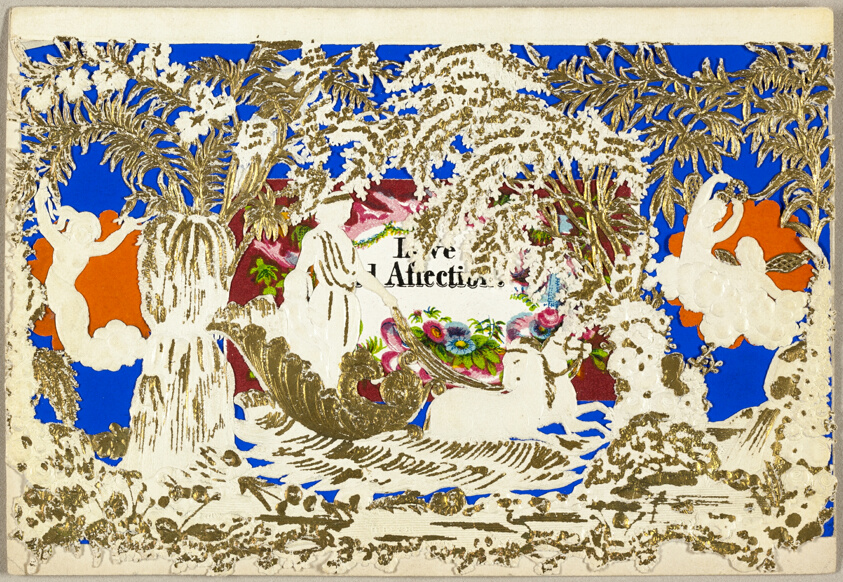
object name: Drawing and Watercolor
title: Untitled Valentine (Couple in Chariot)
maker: John Windsor (English, 19th century)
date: 1860/69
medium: Gold paint with collaged elements on cut and embossed (designed) ivory wove paper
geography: England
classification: collage; valentine; prints and drawing; paper